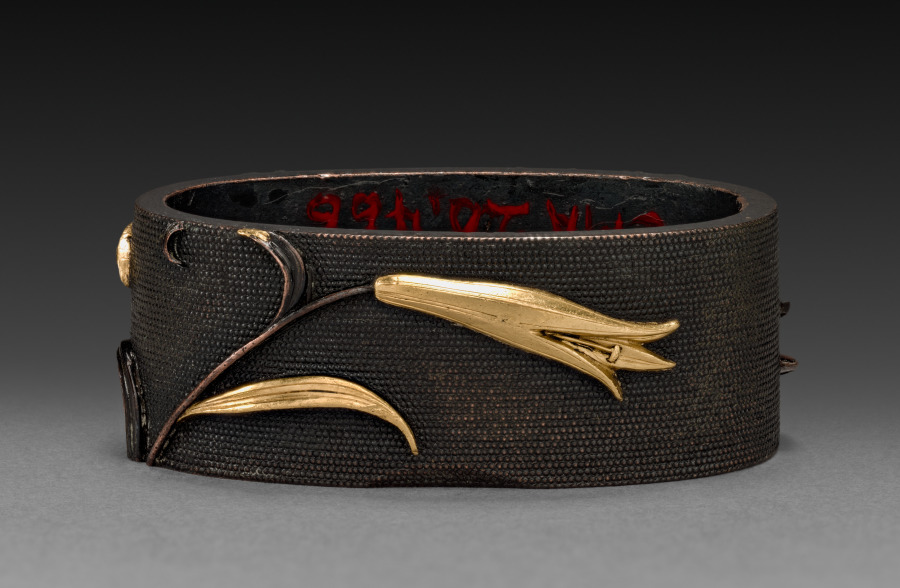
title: Sword-Hilt Collar (Fuchi) with Lily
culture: Japan, Edo period (1615–1868)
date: 1700–1850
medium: shakudo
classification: Arms and Armor